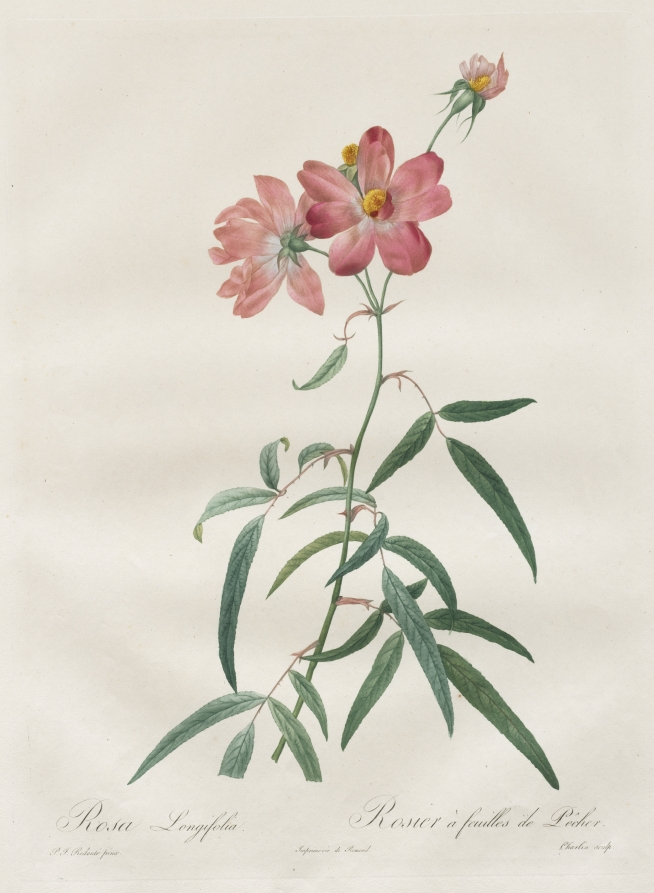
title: Les Roses: Rosa Longifolia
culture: France, 19th century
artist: Henri Joseph Redouté (French, 1766–1853)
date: 1817–1824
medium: stipple and line engraving, with hand coloring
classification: Print